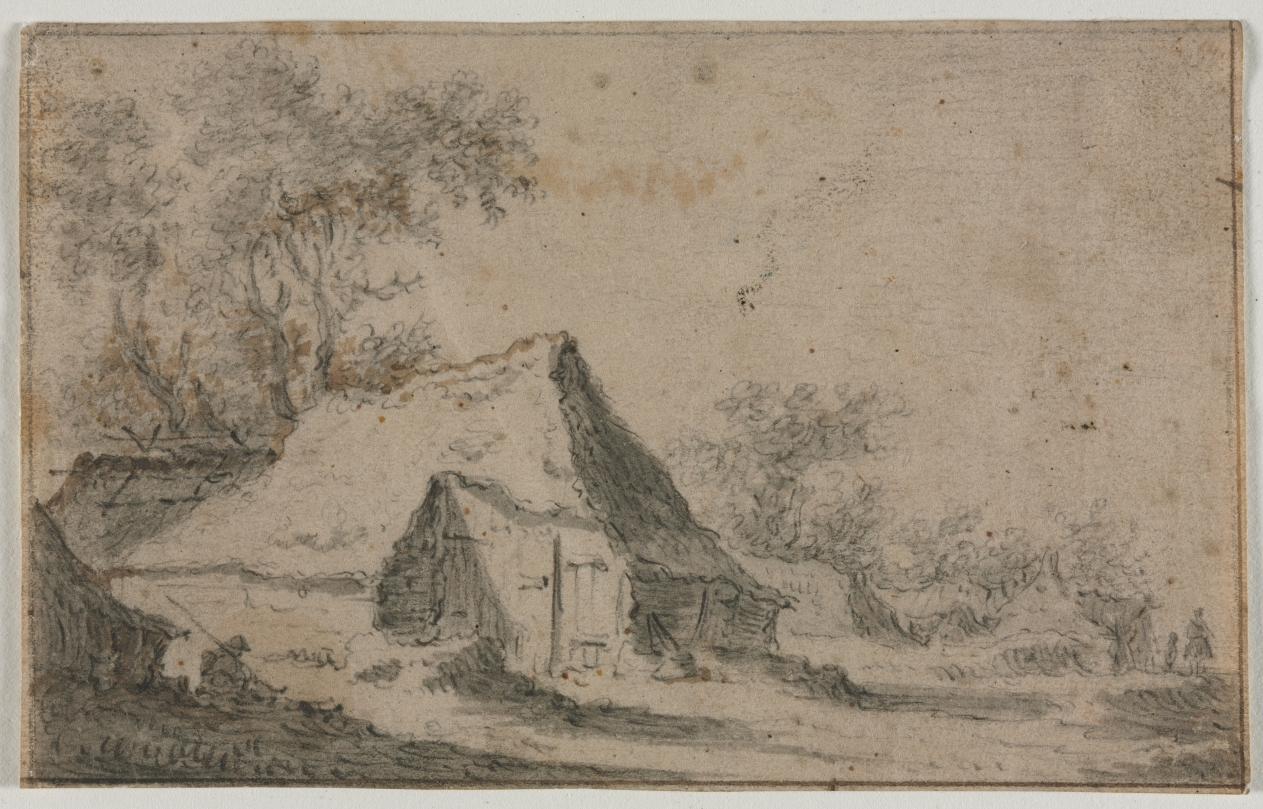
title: The Little Hamlet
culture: Netherlands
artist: Anthonie Waterloo (Dutch, 1609/10–1690)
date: second or third quarter 17th century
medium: black chalk and brush and gray and brown wash; framing lines in black chalk and brown ink (right, bottom)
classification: Drawing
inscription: VERSO, lower left, in graphite: A 2195